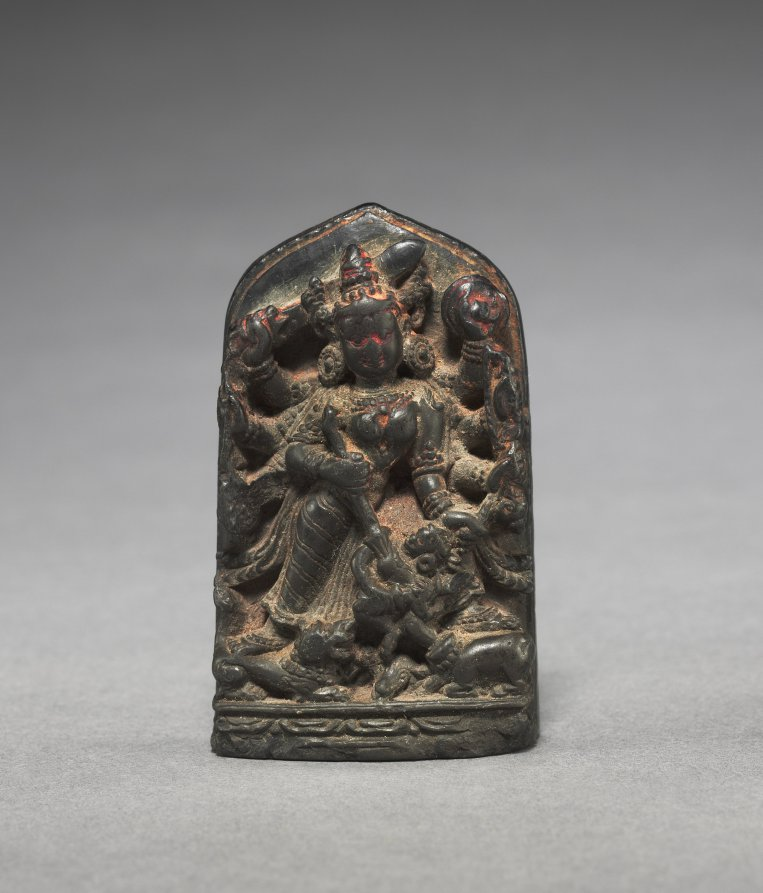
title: Stele with Durga Figure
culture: India, Sena dynasty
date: 1100s-1200s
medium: black chlorite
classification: Sculpture